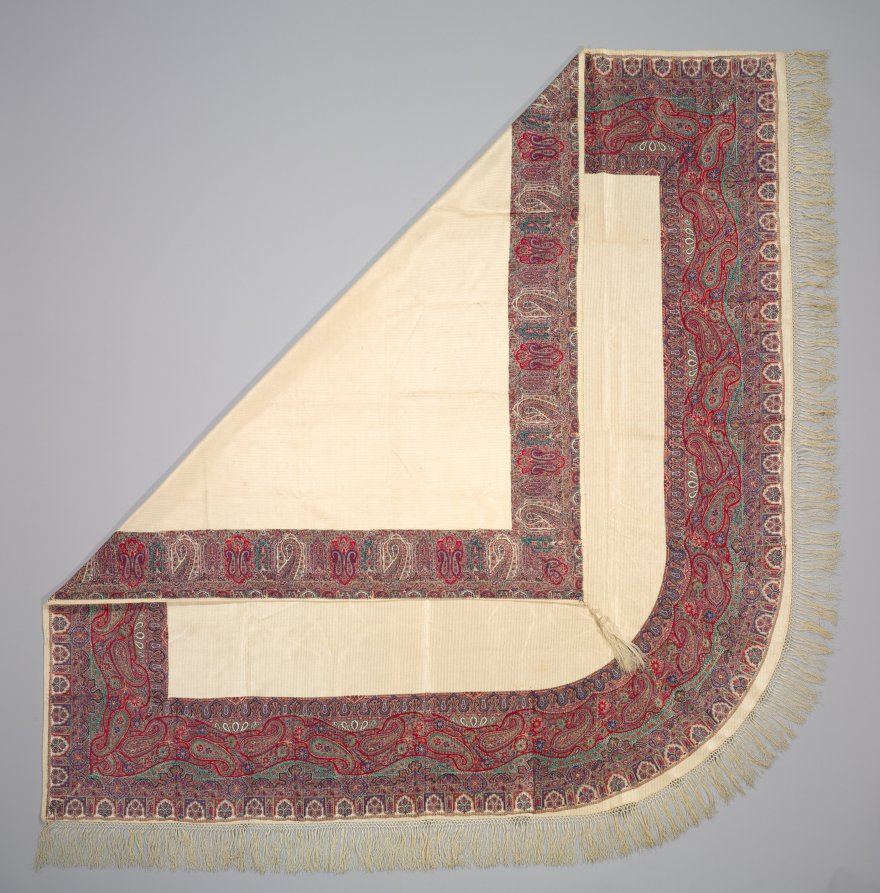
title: Printed Silk Turnover Shawl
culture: France, 19th century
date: 1835–1840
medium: silk; woven and printed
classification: Textile